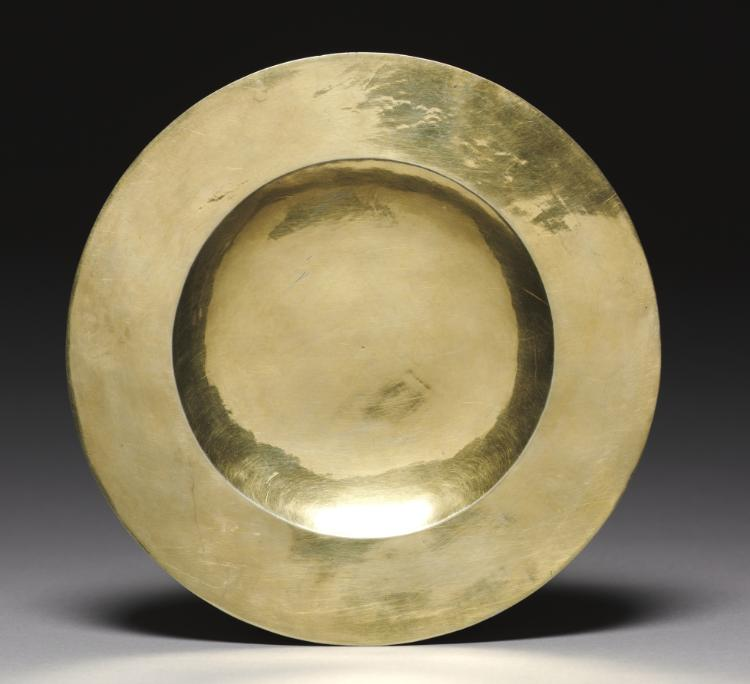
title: Paten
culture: Hungary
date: c. 1450–80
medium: gilt silver and filigree enamel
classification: Metalwork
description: The chalice and paten—the most important liturgical vessels—are used at the altar by the priest for the consecration of the Eucharistic bread and wine during the celebration of the mass. This chalice survives with its original paten. The form of the chalice evolved over the centuries. Gothic chalices, like this one, gradually developed angular or faceted knops, generally hexagonal, with lobed feet. This sublime example is decorated with filigree enamel consisting of twisted gold wire forming a floral design, which in turn is filled with colorful glass pastes. Gemstones add to the embellishment.